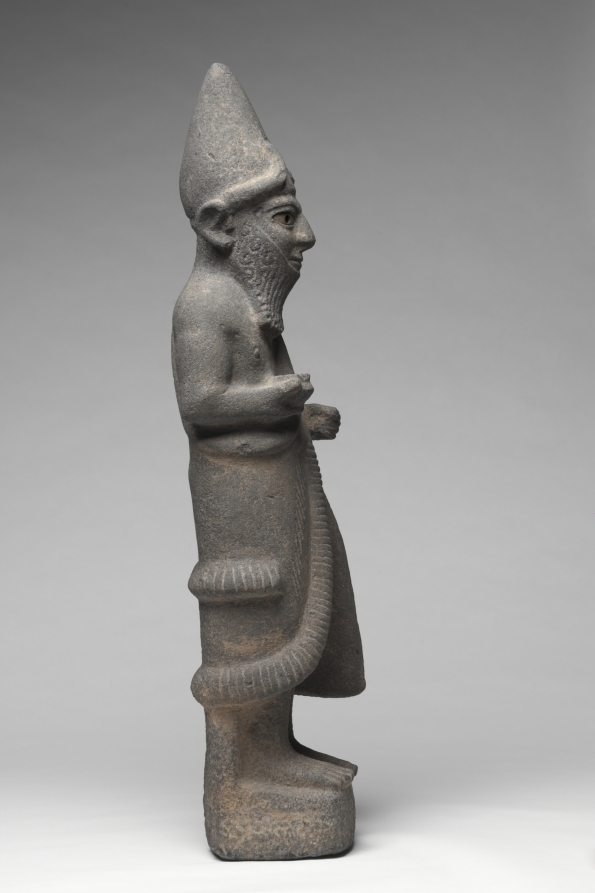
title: Priest-King or Deity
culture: Hittite, North Syria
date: c. 1600 BCE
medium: basalt with bone eyes (left, ancient; right, restored)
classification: Sculpture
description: The Hittites migrated into Anatolia in the 3rd millennium BCE and spoke an Indo-European language, a group that includes Greek, Latin, Persian, Sanskrit, English, and most modern European languages. They were the first ancient people to use iron for weapons. From about 1600–1200 BCE their empire was at its peak, extending from central Anatolia to Syria, and south along the eastern Mediterranean. Their vast empire and interest in commerce enabled the Hittites to spread Mesopotamian ideas and culture throughout the ancient Mediterranean world. This large basalt sculpture is exceptionally rare in depicting a Hittite god or priest-king wearing a horned conical crown, false beard, and long robe. He holds a bowl in his right hand and once held something in his left, perhaps a staff or sword.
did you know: The left eye of the sculpture is the original bone inlay while the right eye is a modern restoration done after the piece was damaged.